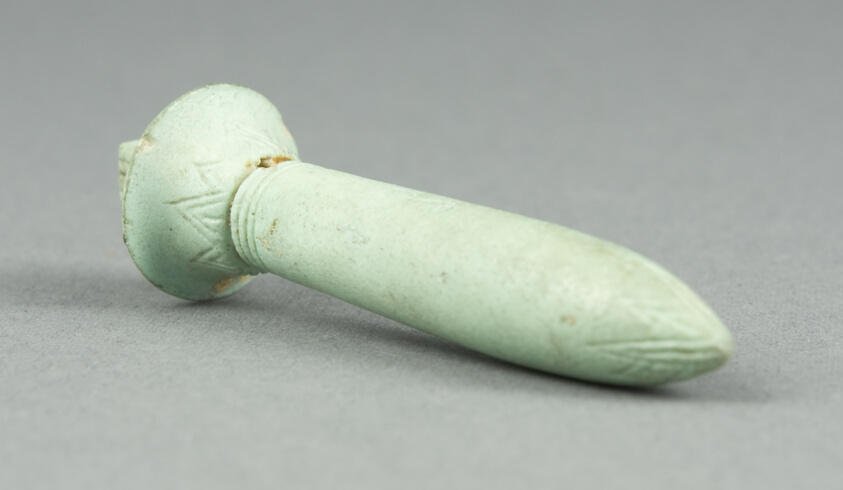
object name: Costume and Accessories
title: Amulet of a Papyrus Column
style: third intermediate period, egyptian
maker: Egyptian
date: Third Intermediate Period, Dynasty 21–25 (1070–656 BCE)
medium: Faience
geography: Egypt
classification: amulet; jewelry; ceramics; ancient art; costume; faïence (composite material)